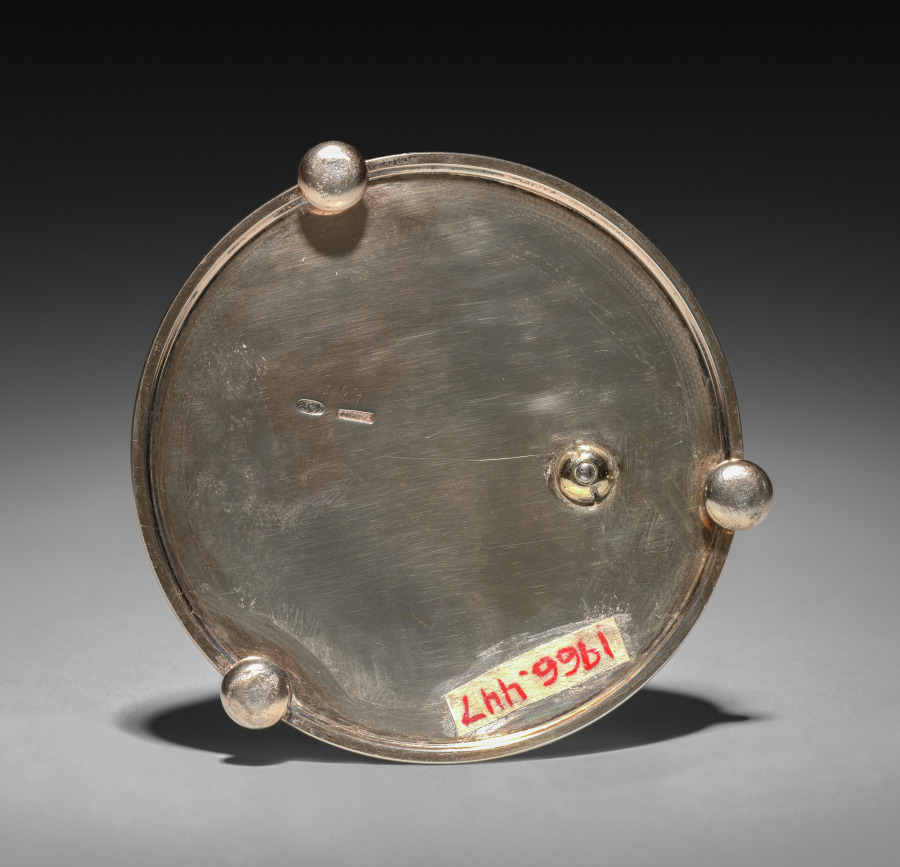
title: Perch for the Parrot on a Perch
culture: Russia, St. Petersburg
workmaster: Mikhail Evlampievich Perkhin (Russian, 1860–1903)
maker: House of Fabergé (Russian, 1842–1918)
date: 1896–1903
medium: Silver, enamel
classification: Miscellaneous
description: This frame is meant to hold a hardstone parrot sitting on a perch. In creating luxurious accessories for a desk or tabletop, Fabergé often used native hardstones such as multicolored agate and jasper, green nephrite, pink rhodonite, and rock crystal found in the Ural Mountains of western Russia. By paying careful attention to the unique colors and textures of the stones, Fabergé and his craftsmen brought them to life, turning milky agate into a begging poodle or green and black jasper into a parrot sitting on a perch. The use of native materials also promoted Russian nationalism, which appealed greatly to the tsar and his family.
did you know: This perch is part of a figure of a parrot sitting on a perch.